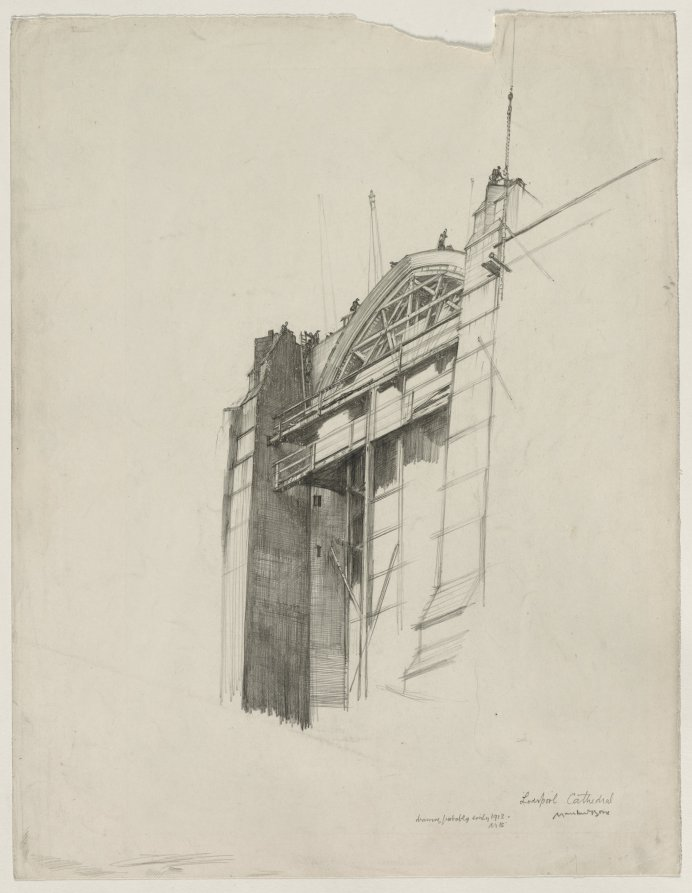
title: Liverpool Cathedral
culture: England, 20th century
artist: Muirhead Bone (British, 1876–1953)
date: 1913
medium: graphite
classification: Drawing